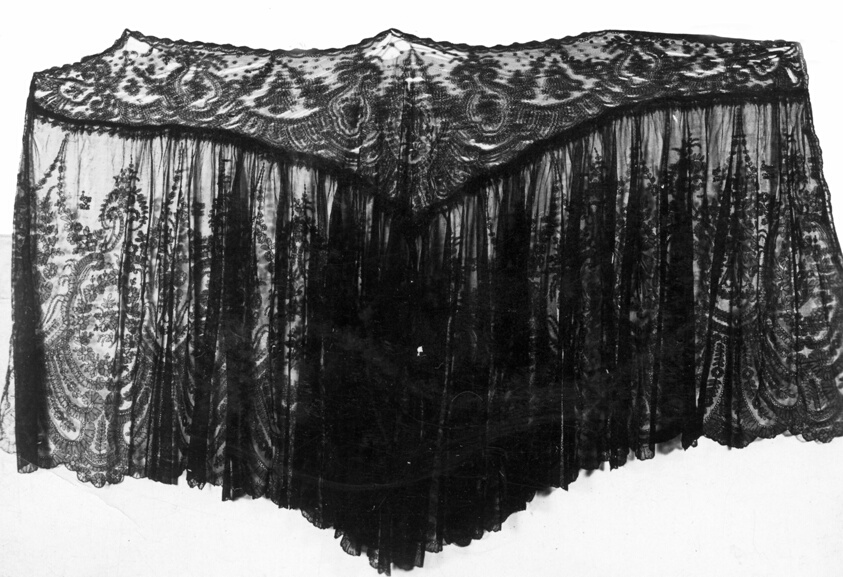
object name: Textile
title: Cape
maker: Probably England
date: 1855/65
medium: Silk, Warp frame machine lace edged with straight down machine lace imitation of "Bayeux" bobbin lace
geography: England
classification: textile; lace - machine